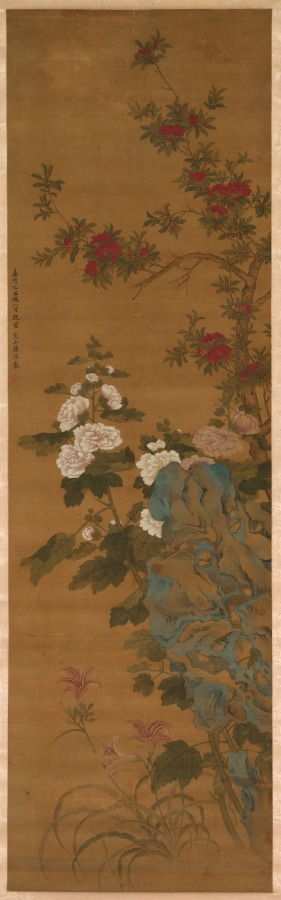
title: Flowers and Rocks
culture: China, Ming dynasty (1368–1644)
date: 1368–1644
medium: hanging scroll, color on silk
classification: Painting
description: Here, the painter uses delicate brushwork and vivid colors to depict an early summer scene of three kinds of flowers growing beside a garden rock: From top to bottom we see flowering pomegranate, then peonies, and lilies below. Like the peony, which conveys wishes for wealth and prosperity, the pomegranate flower, here in festive red color turning soon into fruit with many seeds, is associated with the wish for many sons. The lily, in Chinese "baihe," is a homophone with the pun "togetherness for a hundred years," expressing wishes for harmony and unity. The scroll would have made a suitable gift to married women.